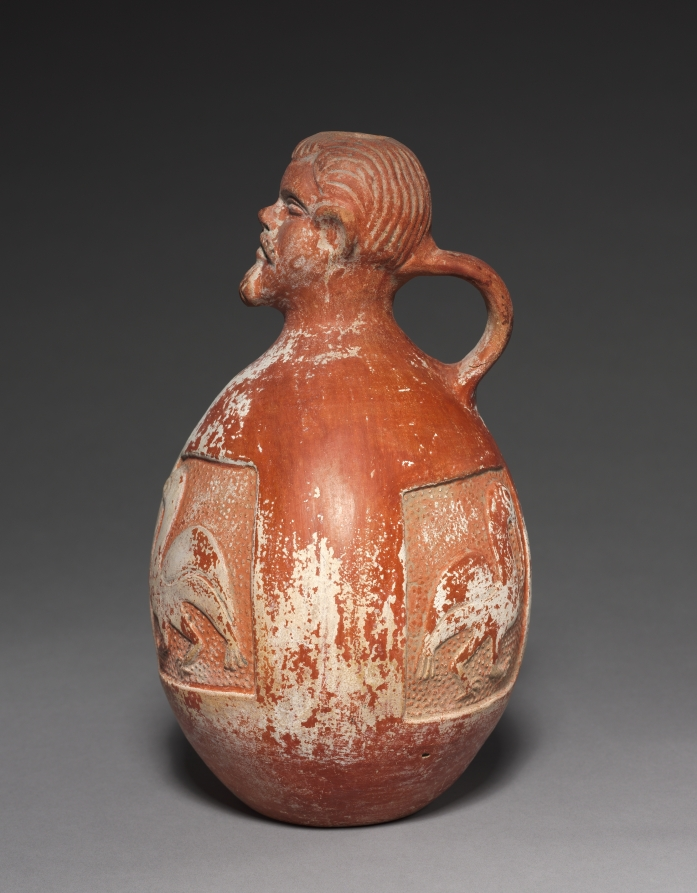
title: Urn or Jug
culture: Peru, 16th century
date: 1532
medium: pottery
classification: Ceramic